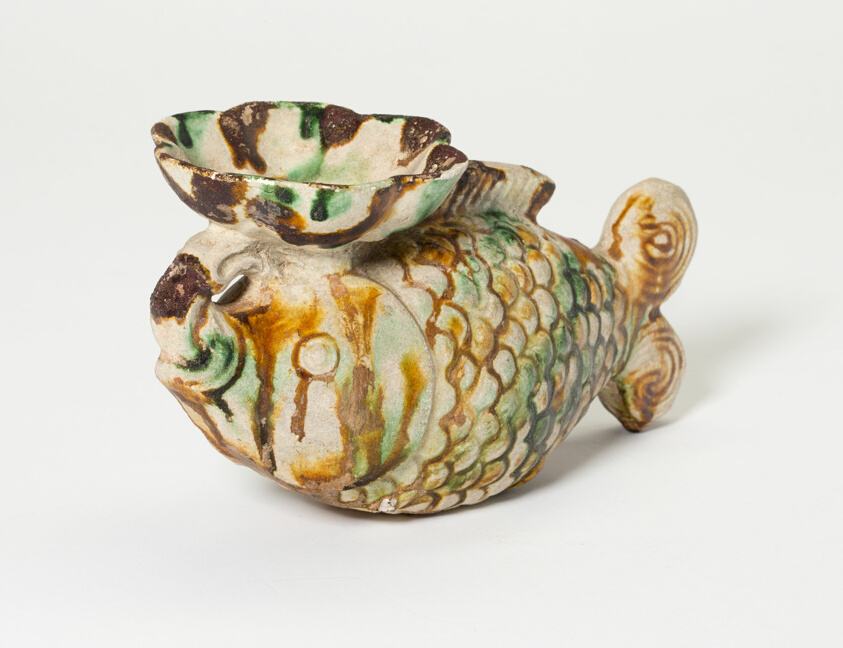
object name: Vessel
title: Fish-Shaped Oil Lamp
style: Chinese (culture or style)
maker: China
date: Tang dynasty (618–906), first half of 8th century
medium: Slip-coated earthenware with three color (sancai) lead glazes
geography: China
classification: earthenware; asian art; ceramics; vessel